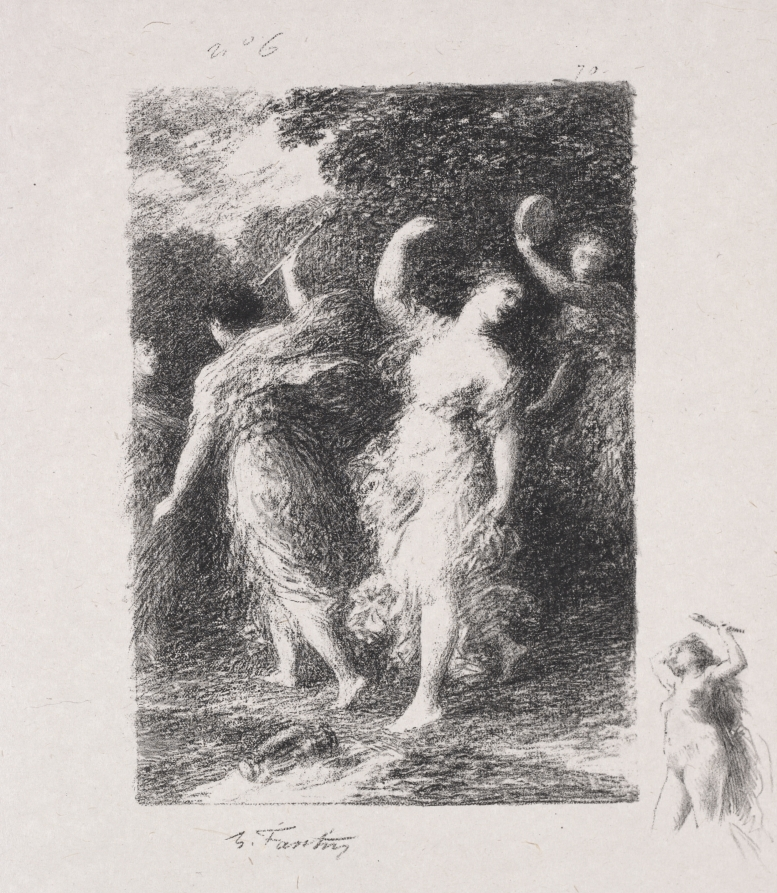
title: Bacchus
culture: France, 19th century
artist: Henri Fantin-Latour (French, 1836–1904)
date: 1903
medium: lithograph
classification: Print